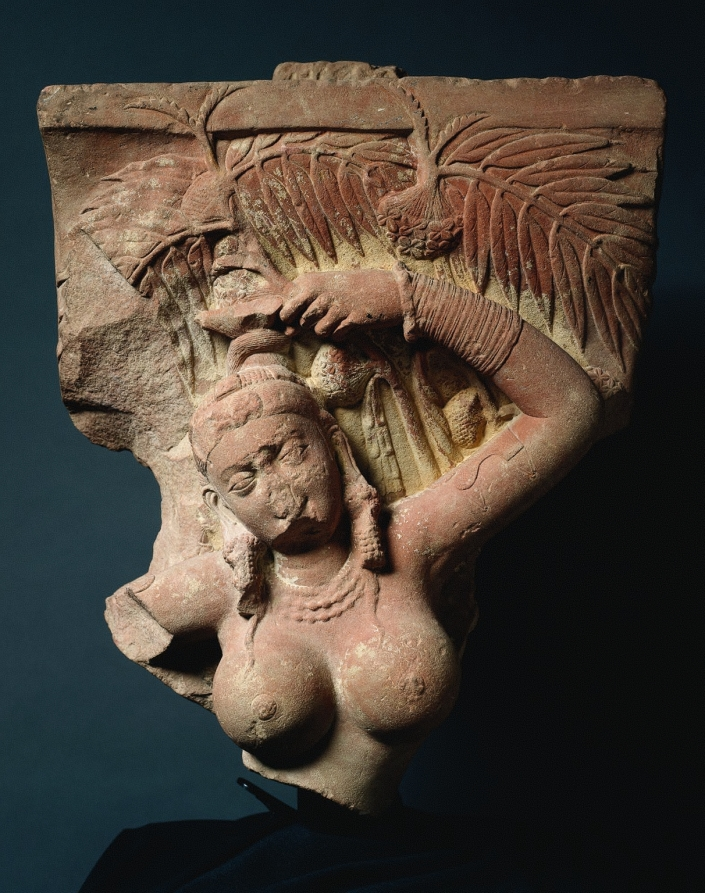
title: Gateway Bracket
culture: India, Mathura, Kushan period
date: 150–200 CE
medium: sandstone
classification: Sculpture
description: Gateways leading into a sacred area often had large horizontal architraves, the weight of which was supported by brackets carved with figures of voluptuous women grasping the branch of a tree. They embody the ideal form of the young mother, with breasts full of nourishing milk. As personifications of the sap that pervades living plants, they are auspicious markers of life and abundance. These attractive figures, who embody the purifying water essential for life, symbolically cleanse visitors as they enter the sacred space. On both sides of this large bracket they grasp the branch of an ashoka tree, which has clusters of flowers that are bright red in nature.